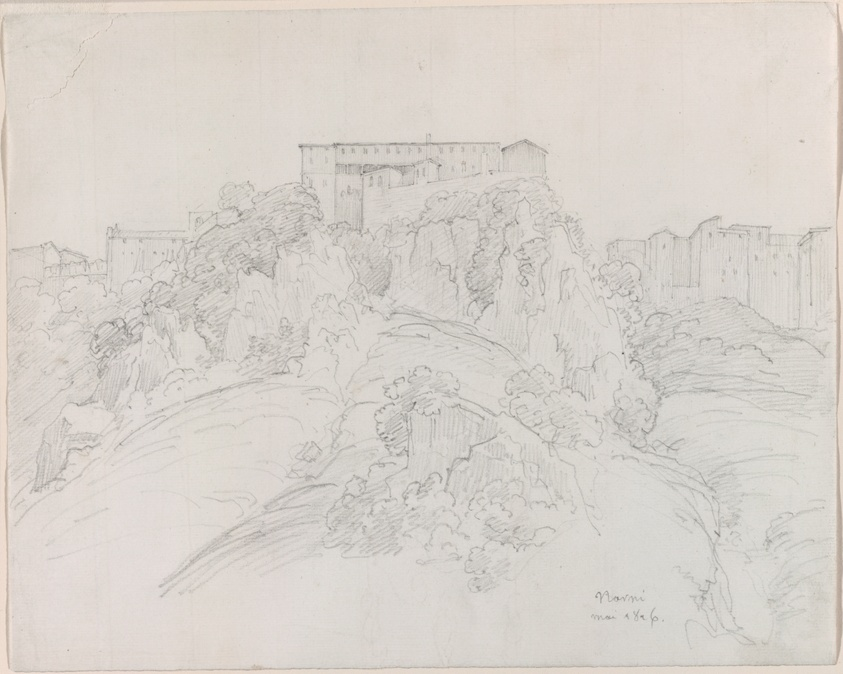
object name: Drawing and Watercolor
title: View of Narni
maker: Jean-Baptiste-Camille Corot; French, 1796-1875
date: 1826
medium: Graphite on ivory laid paper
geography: France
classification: graphite; drawings (visual works); prints and drawing